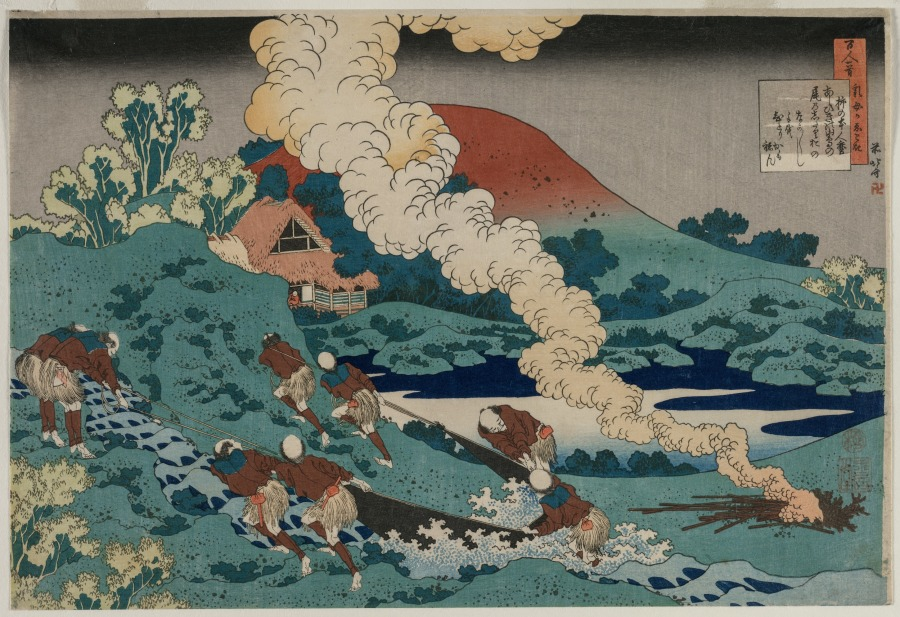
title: Poem by Kakinomoto no Hitomaro, from One Hundred Poems by One Hundred Poets Explained by an Old Nurse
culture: Japan, Edo period (1615–1868)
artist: Katsushika Hokusai (Japanese, 1760–1849)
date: 1835–36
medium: color woodblock print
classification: Print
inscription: Signature: Zen Hokusai 前北斎. Artist's Seal: Manji 卍. Publisher: Nishimuraya Yohachi (Eijudo 永寿堂). Censorship Seal: kiwame 極.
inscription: Poem: あしひきの 山鳥のをの しだりをの ながながしよを ひとりかも寝ん Ashibiki no/ yamadori no o no/ shidari o no/ naganagashi yo o/ hitori ka mo nemu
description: Katsushika Hokusai designed this print series from the perspective of a confused nurse attempting to illustrate classical poetry but missing the subtle allusions. This interpretation creates what would have been considered a comical disconnect between poem and image. The poem, by Kakinomoto no Hitomaro (about 660–739), reads as follows: Must I sleep alone through the long autumn nights, long like the dragging tail of the mountain pheasant separated from his dove? —translation by Joshua Mostow Hitomaro wrote of an emotionally tiring night. The nurse thought instead of the physically exhausting work of fishermen dragging a net upstream. Smoke billows across the scene, directing our attention to a figure, perhaps the nurse, in the distant house.